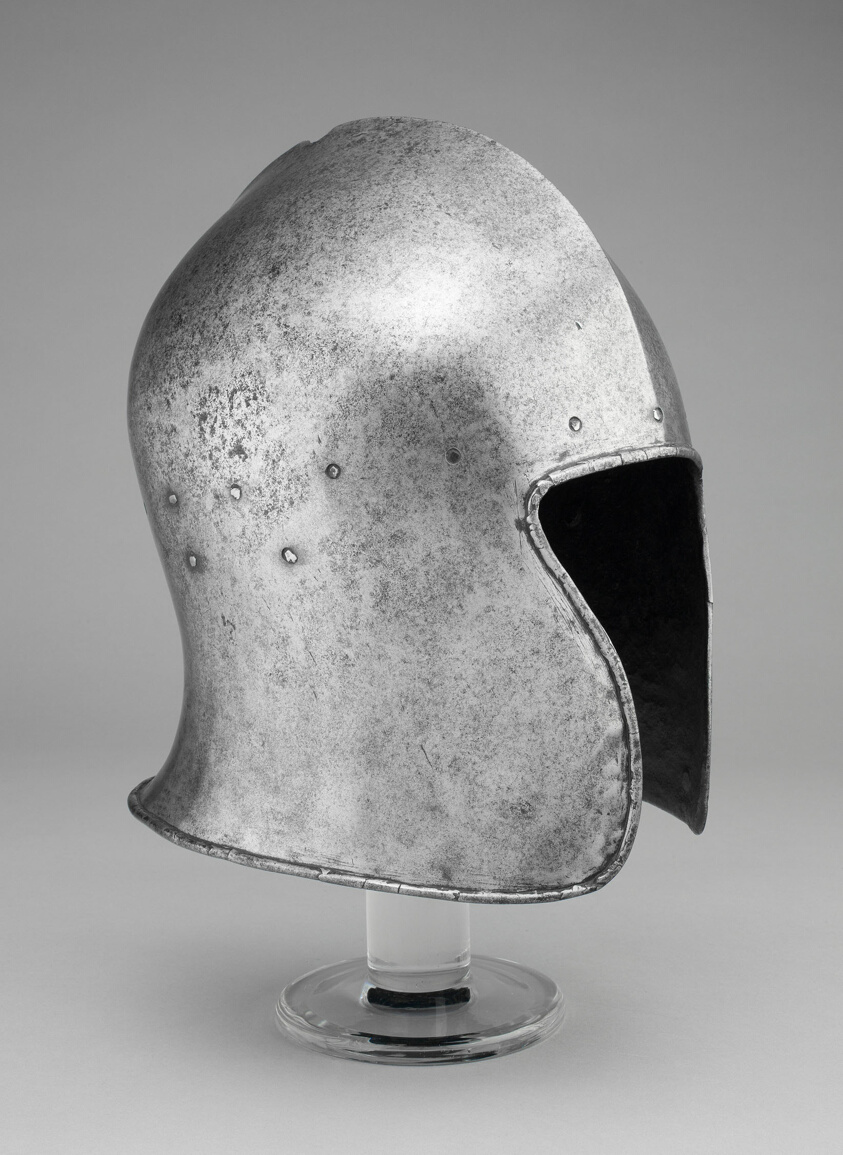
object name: Armor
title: Sallet (Barbute)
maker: North Italian, Milan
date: c. 1460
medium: Steel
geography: Milan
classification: suit-helmet; armor; arms and armor